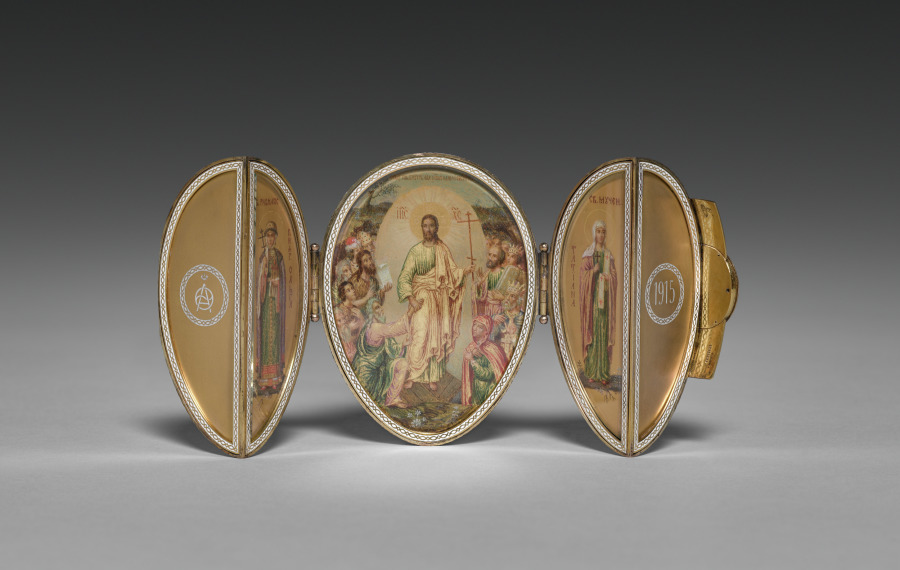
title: Imperial Red Cross Easter Egg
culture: Russia, St. Petersburg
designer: Peter Carl Fabergé (Russian, 1846–1920)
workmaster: Henrik Wigström (Russian, 1862–1923)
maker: House of Fabergé (Russian, 1842–1918)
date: 1915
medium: gold, silver gilt, enamel, glass, ivory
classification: Miscellaneous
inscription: inscribed on interior of egg: symbols for Alpha and Omega and imperial crown for Alexandra Feodorovna; 1915; inscriptions in Cyrillic, Old Church Slavonic, and Roman letters which identify Sts. Olga and Tatiana and presumably describe the central scene of the triptych.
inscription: Inscribed on silk velvet and satin lined case: double-headed eagle, Fabergé, Petersburg, Moscow, London (all in Cyrillic on lining of case); 17.559, abbreviation for "Red Cross" (in Cyrillic in red ink on outside of case).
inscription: Hallmarks: 72, Kokoshnik, lower case alpha in script [assay mark of St. Petersburg, 1908-26]; H.W. [initials of workmaster Henrik Wigström]; Fabergé (in Cyrillic).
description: The House of Fabergé made two imperial Easter eggs in 1915 that honored the contributions of Tsarina Alexandra and her two eldest daughters, Olga and Tatiana, to the war effort as Red Cross Sisters of Mercy. Compared to other Fabergé eggs elaborately ornamented with jewels, the eggs reflected the mood of austerity in Russia during World War I. This version becomes an icon when opened, revealing miniatures of the patron saints of the tsarina’s daughters. After the Russian Revolution, this relic of the Tsarist past was sold by the Soviet government to raise needed cash for the treasury.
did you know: This egg was confiscated by the Bolsheviks during the Russian Revolution and sold by the government of Josef Stalin in the 1930s to raise money for the Soviet treasury.